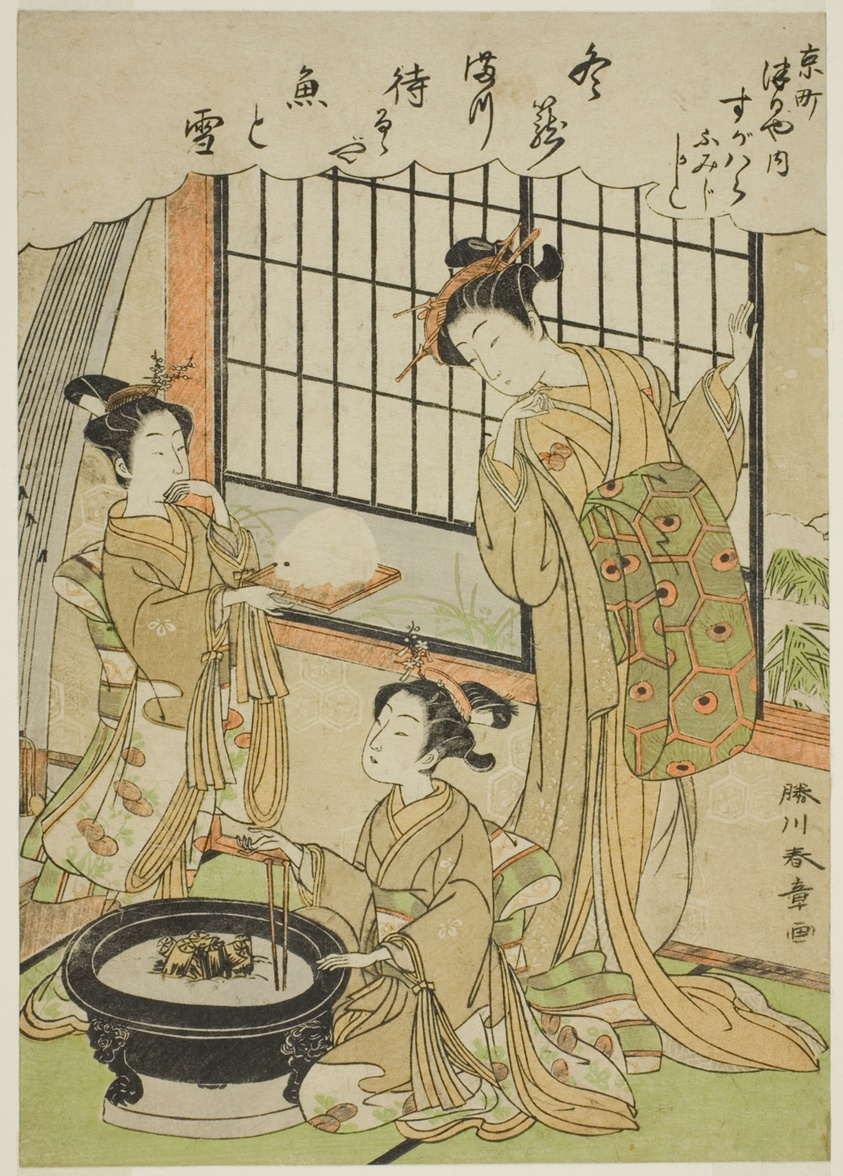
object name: Print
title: The Courtesan Sugawara of the Tsuruya House and Her Kamuro Namiji and Kashiko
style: Japanese (culture or style)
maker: Katsukawa Shunsho 勝川 春章; Japanese, 1726-1792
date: 1771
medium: Color woodblock print; chuban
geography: Japan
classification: woodblock print; print; asian art